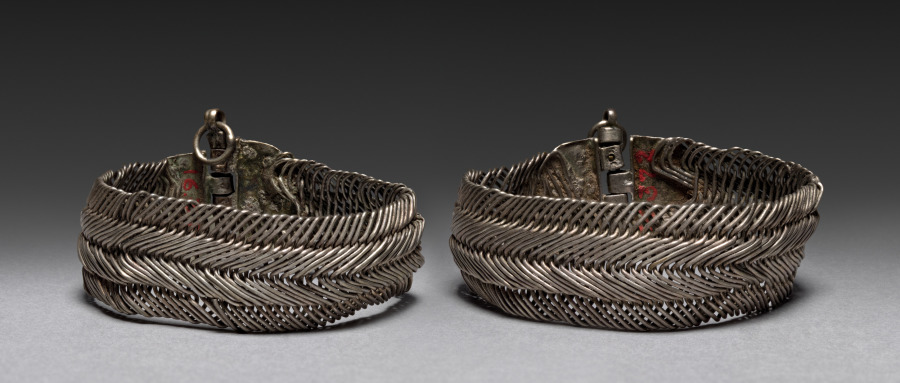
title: Bracelets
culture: Bulgaria, 18th-19th century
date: 1700s-1800s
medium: silver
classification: Jewelry